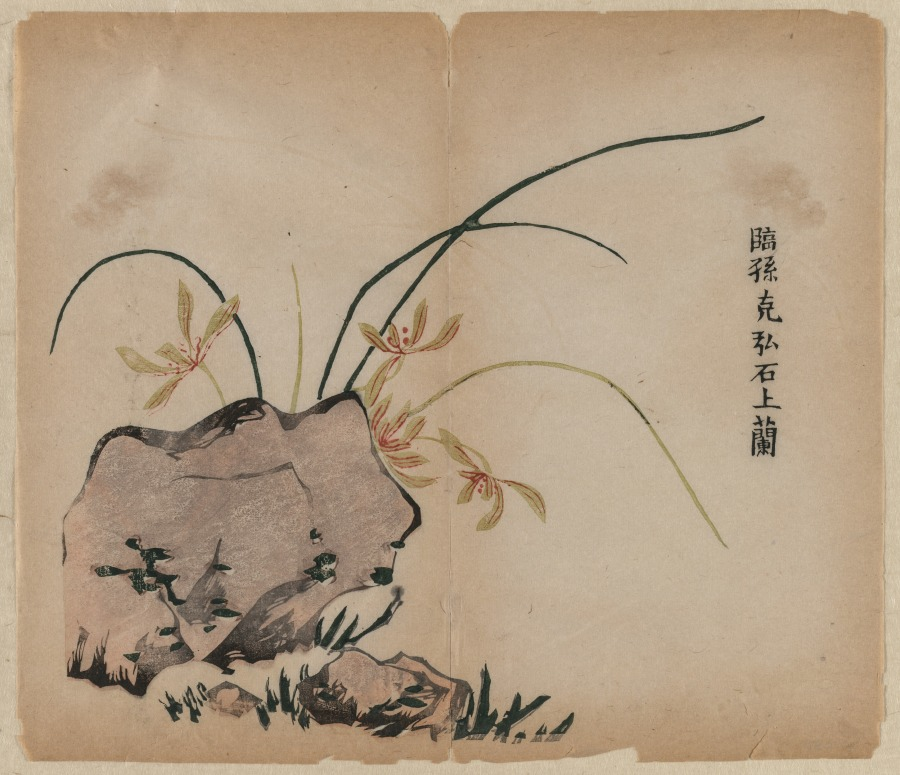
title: Orchid on Rocks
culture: China, Qing dynasty (1644-1911)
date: 1700s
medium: color woodblock print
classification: Print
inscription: 臨孫克弘石上蘭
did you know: This print is from the Mustard Seed Garden Painter's Manual.